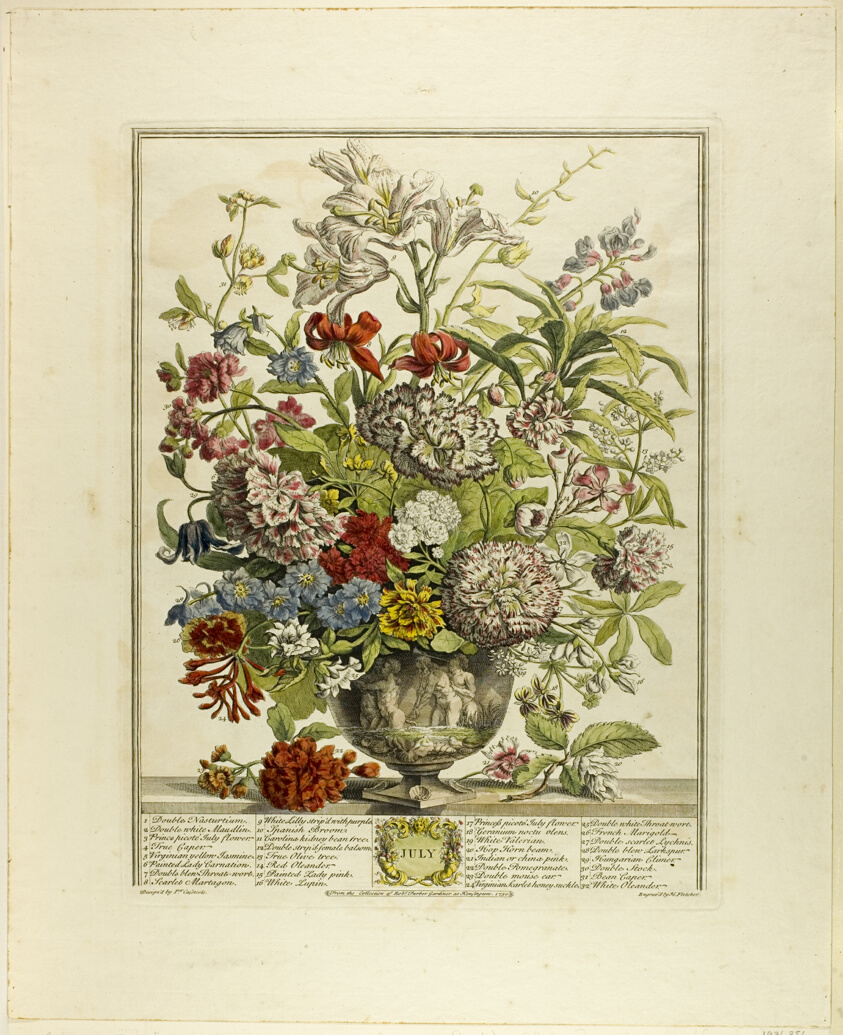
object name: Print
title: July, from Twelve Months of Flowers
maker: Henry Fletcher (English, 1710-1750); after Peter Casteels III (Flemish, 1684-1749)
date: 1730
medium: Hand-colored etching on laid paper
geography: England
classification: etching; print; prints and drawing